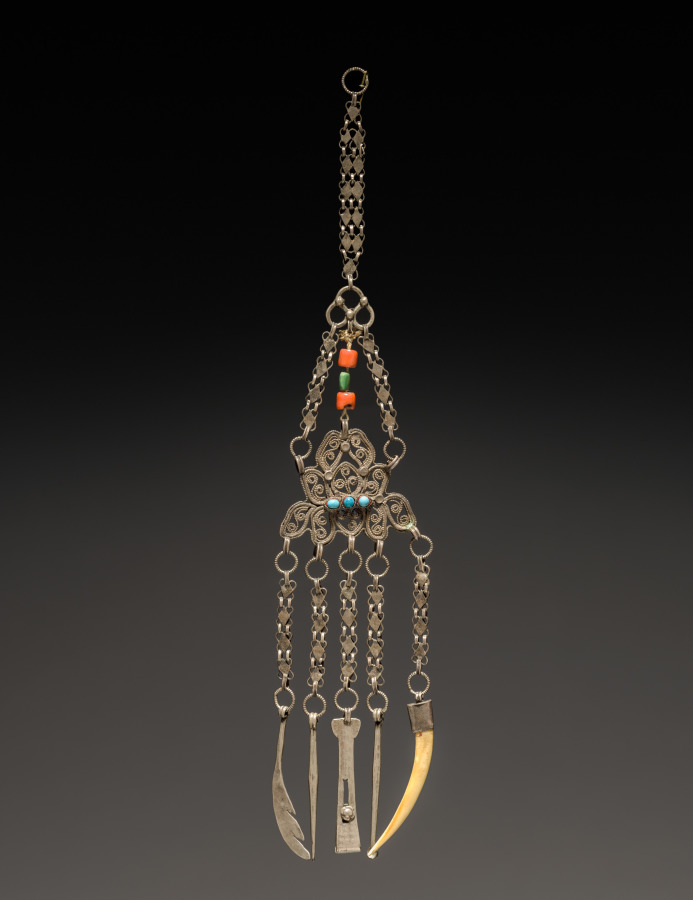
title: Chatelaine with Toilet Articles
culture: Tibet (or Nepal), 19th century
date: 1800s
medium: silver with semiprecious stones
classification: Jewelry